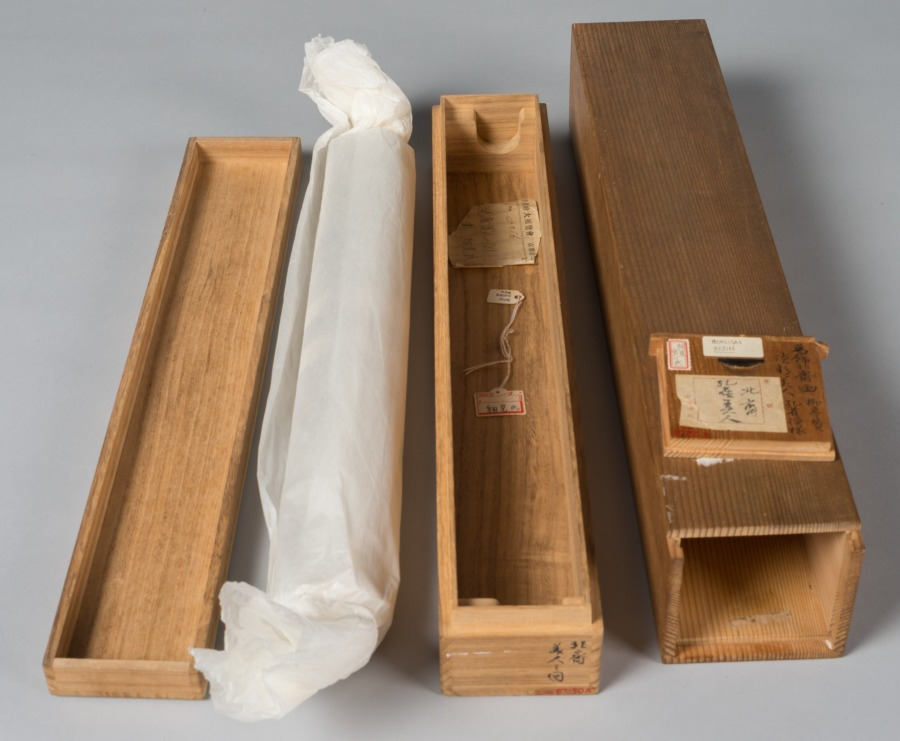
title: Beauty (Bijin)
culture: Japan, Edo period (1615–1868)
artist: Katsushika Hokusai (Japanese, 1760–1849)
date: c. 1775–1849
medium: hanging scroll; ink and color on paper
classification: Painting